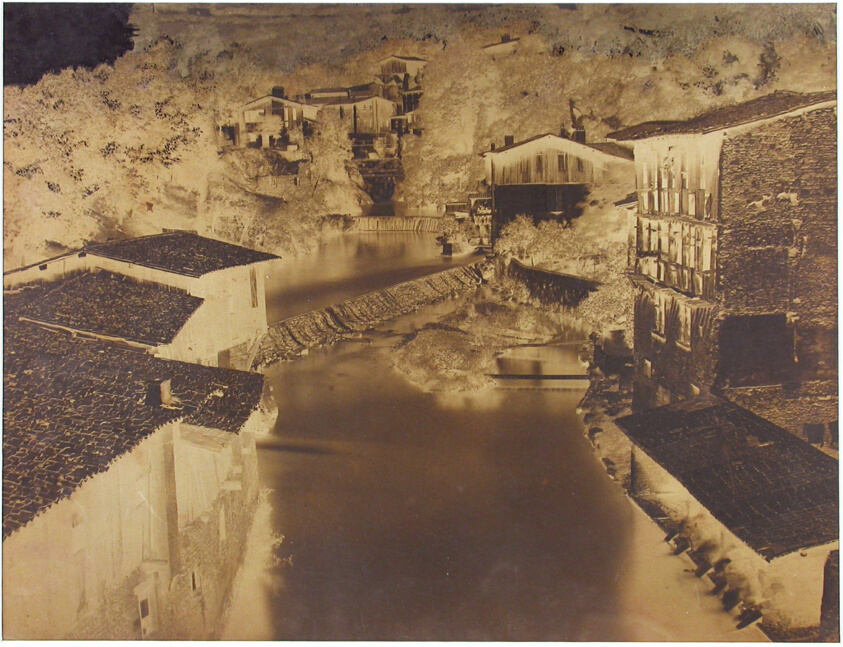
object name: Photograph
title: Untitled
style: 19th century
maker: Édouard Baldus; French, born Germany, 1813–1889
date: 1854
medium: Waxed paper negative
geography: France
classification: photograph; photography